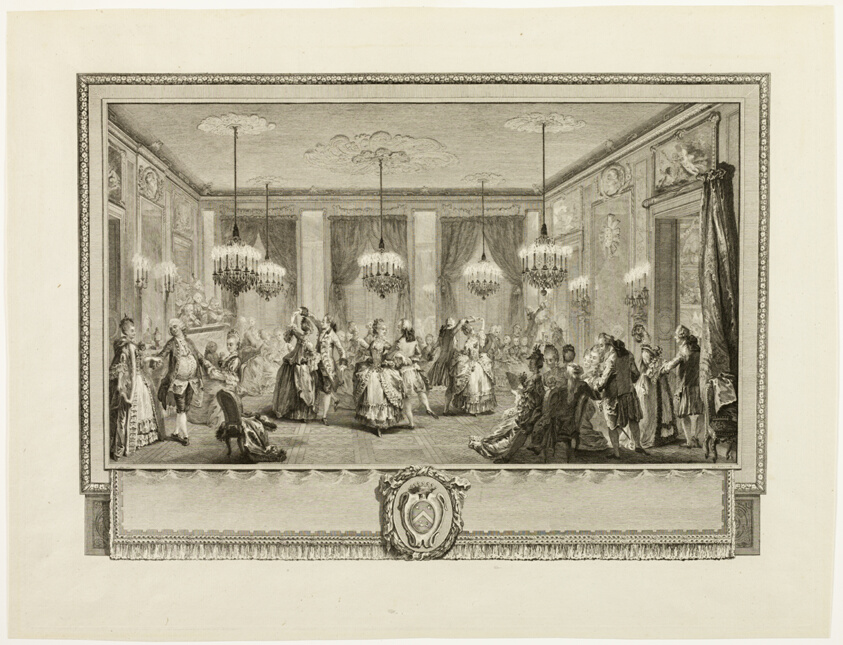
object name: Print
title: Bal Paré (The Jewel Ball)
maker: Antoine-Jean Duclos (French, 1742-1795); after Augustin de Saint-Aubin (French, 1736-1807)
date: 1774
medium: Etching and engraving on ivory laid paper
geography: France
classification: etching; print; prints and drawing